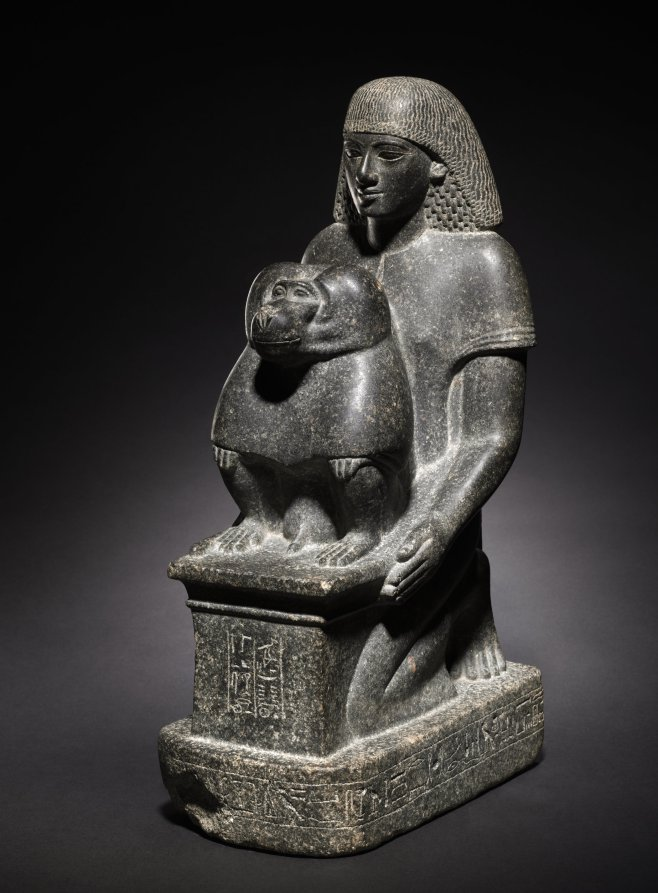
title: Statue of Minemheb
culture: Egypt, New Kingdom (1540–1069 BCE), Dynasty 18, reign of Amenhotep III (1390–1352 BCE)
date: c. 1391–1353 BCE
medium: granodiorite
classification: Sculpture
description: Minemheb was one of the many court officials who helped prepare for Amenhotep III's 30-year jubilee festival. Clearly, Minemheb regarded this as the high point of his career, since his title as chief of construction for the jubilee temple is the primary one provided on this statue. It is actually a statue within a statue: Minemheb kneels to present a small altar, upon which squats a statue of the god Thoth in baboon form. Carved in extremely hard stone, Minemheb's statue is nonetheless carefully detailed and superbly modeled. Special attention was given to the rendering of the baboon's face. The heavy-lidded eyes and furrowed brow give the animal an almost contemplative expression.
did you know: The baboon in this sculpture is the god Thoth in one of his animal forms.